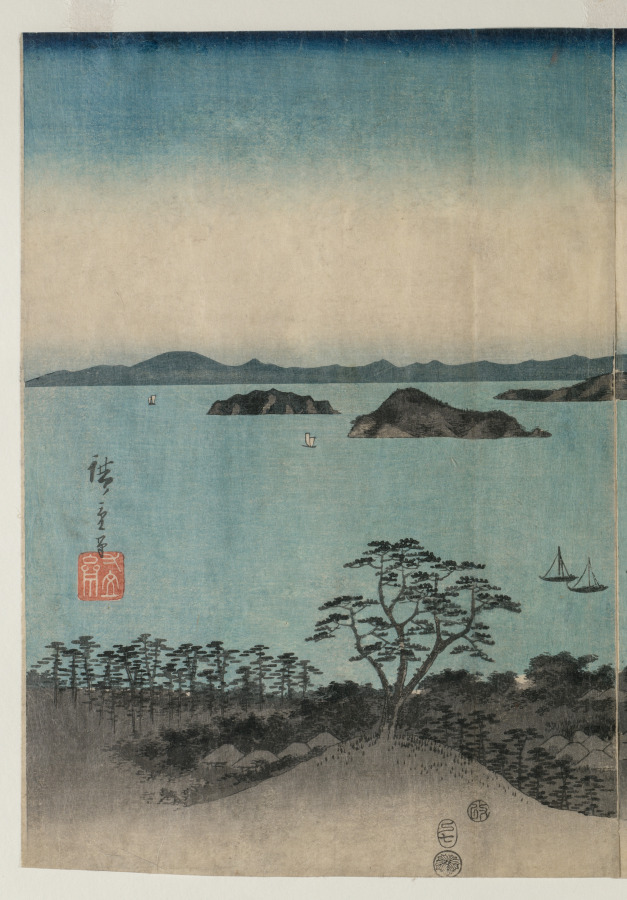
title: Full Moon on Kanazawa, Musashi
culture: Japan, Edo period (1615–1868)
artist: Utagawa Hiroshige (Japanese, 1797–1858)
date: 1857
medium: One of a triptych of color woodblock prints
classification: Print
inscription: Signature: Hiroshige hitsu (left panel). Artist Seal: Ichiryusai. Publisher: Okazawaya Taheiji. Censorship seal: aratame.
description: Late in his career, Hiroshige explored the poetic theme of setsugekka, “snow, moon, and flowers,” in a set of three triptychs. This panoramic scene shows the autumn moon over Kanazawa, near Tokyo. Hiroshige’s contemporaries would have recognized the coastline dotted with villages, fishing boats, and the distinctive double-arched bridge at the bottom right.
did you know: The artist’s signature and red seal are on the left sheet of paper.